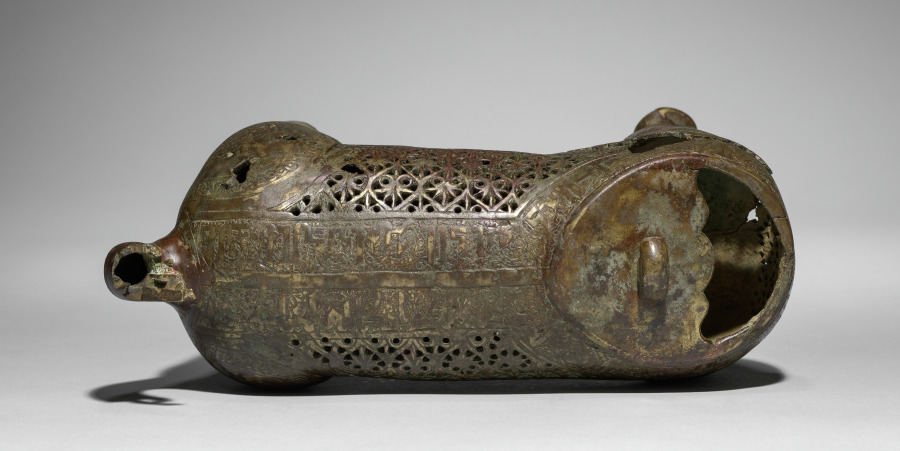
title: Feline Incense Burner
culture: Iran, Khurasan, Seljuq period of Iran (1037–1194)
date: 1150–1200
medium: Copper alloy, cast, engraved, chased, and pierced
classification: Metalwork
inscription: Qur'an sura al-jum'ah (The Friday Congregation) 62:9-10 (on neck and spine)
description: In Iran during the 1000s and 1100s, vessels in the shape of animals gained popularity, especially as incense burners. Felines were favored in Persian art and this piece may represent a caracal, a type of lynx. The head of the creature was cast separately and is removable to fill its body with hot coals and incense. Qur’anic verses on the neck and spine remind worshippers to set work aside, attend prayer, and then disperse to seek God’s bounty. The diffusion of perfumed smoke through the burner’s pierced palmette design may have served as a sensorial reminder of this teaching.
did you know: A Kufic inscription against a background of scrolling arabesques runs along the back and neck of the feline form.